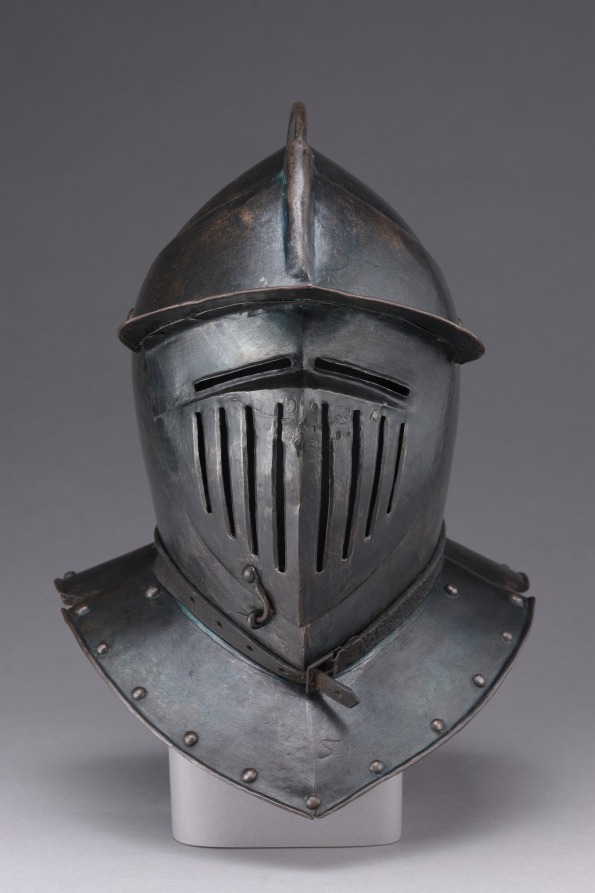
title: Cuirassier's Armor: Helmet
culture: Austria, Graz(?), early 17th century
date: c. 1600–20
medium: steel (originally blued, now black); leather straps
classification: Arms and Armor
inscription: Proof mark (musket shot) is located on the proper left side of the breastplate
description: The cuirassier was the heavy cavalryman of the late 1500s and early 1600s. Carrying pistols and a sword, he was clad in full armor, with the exception of his lower legs, which were protected by heavy riding boots. Shortly after 1650, such heavy cavalry armor disappeared from use. By then, European cavalries had abandoned full armor as impractical against the increased sophistication of firearms.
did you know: When assembled, this suit of armor is just over 5-1/2 feet tall.